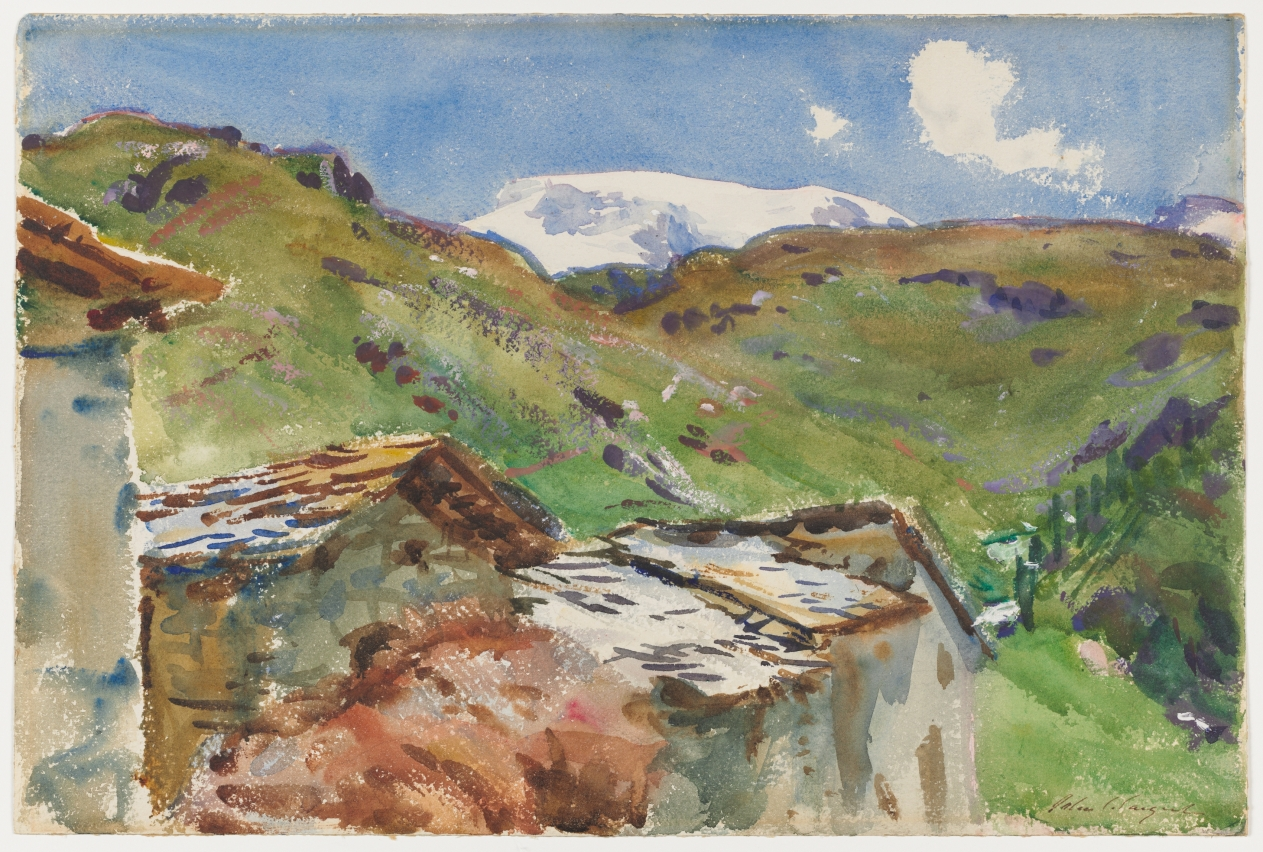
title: In Austrian Tyrol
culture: America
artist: John Singer Sargent (American, born Italy, 1856–1925)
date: 1911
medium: watercolor with traces of graphite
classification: Drawing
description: Although Sargent’s career was defined by his portraits of high-society patrons, privately he painted landscapes in watercolor and oil throughout his career. After the turn of the century, assured of his reputation, Sargent produced more landscapes than any other kind of painting. Alpine views were among his favorite subjects, but he avoided associating them with the rhetoric of the sublime. Instead, mountain views such as In Austrian Tyrol were closely cropped, often rendered from a low vantage point. The visual relationship between the shapes of the foreground rocks and the mountains themselves was what captured his attention.